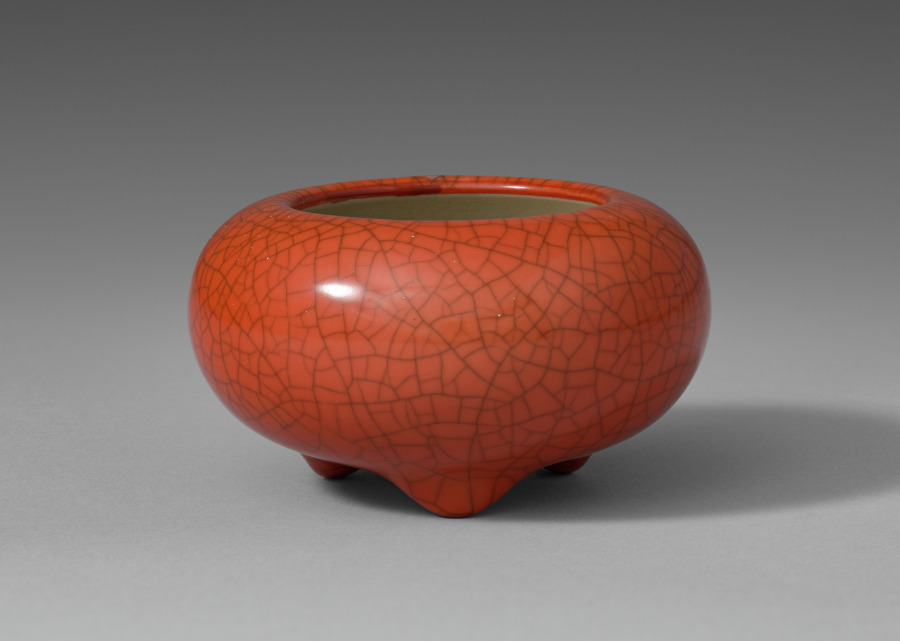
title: Incense Burner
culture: Japan, Meiji period (1868–1912)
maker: Seifū Yohei III (Japanese, 1851–1914)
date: 1893–1914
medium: Porcelain with coral red and crackled glaze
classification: Ceramic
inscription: 清風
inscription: "Hyatt King"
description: The tiniest of containers, this ovoid tripod is an incense burner. It likely once had an openwork metal lid. It is remarkable for its coral red color and crackled glaze. In contrast to the exterior, the interior has been left white under a transparent glaze. The “coral red glaze” is one Yohei III developed in 1887 and called sangōyu. Sensational among colors known at that time, Yohei III won first prize for his work glazed with it at the annual exhibition of the Japan Art Association (Bijutsu Kyokai) in 1888.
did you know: Seifū Yohei III’s incense burner has a red glaze that is difficult to achieve.